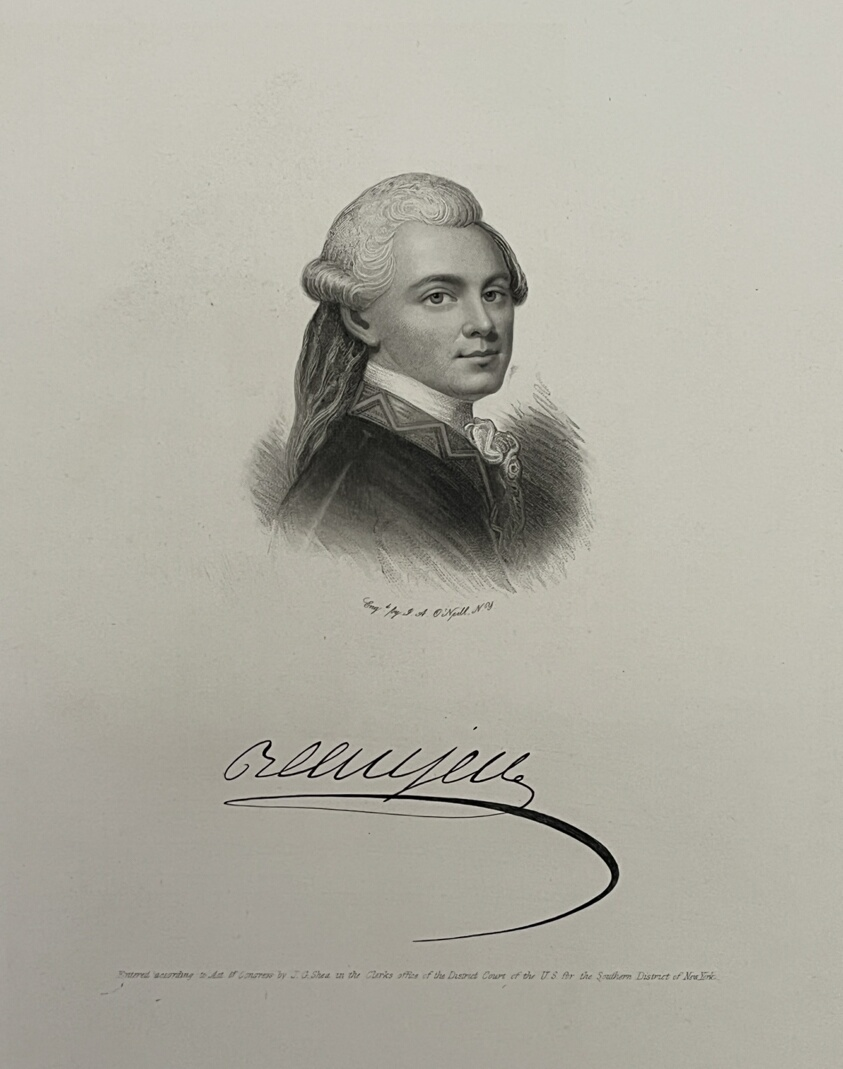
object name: Print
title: Beaujeu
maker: J.A. O'Neill (American, 19th century)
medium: Steel engraving on paper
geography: United States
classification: reproduction; print; prints and drawing